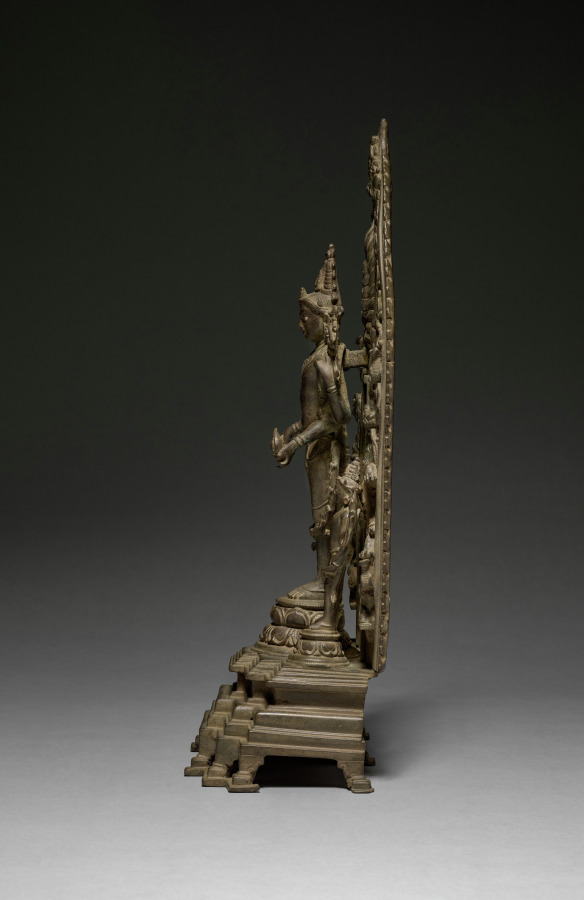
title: Vishnu Attended by Chakrapurusa and Shankhapurusa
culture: East India, Bengal, Pala period, 11th-12th century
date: 1000s–1100s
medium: bronze with silver inlay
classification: Sculpture